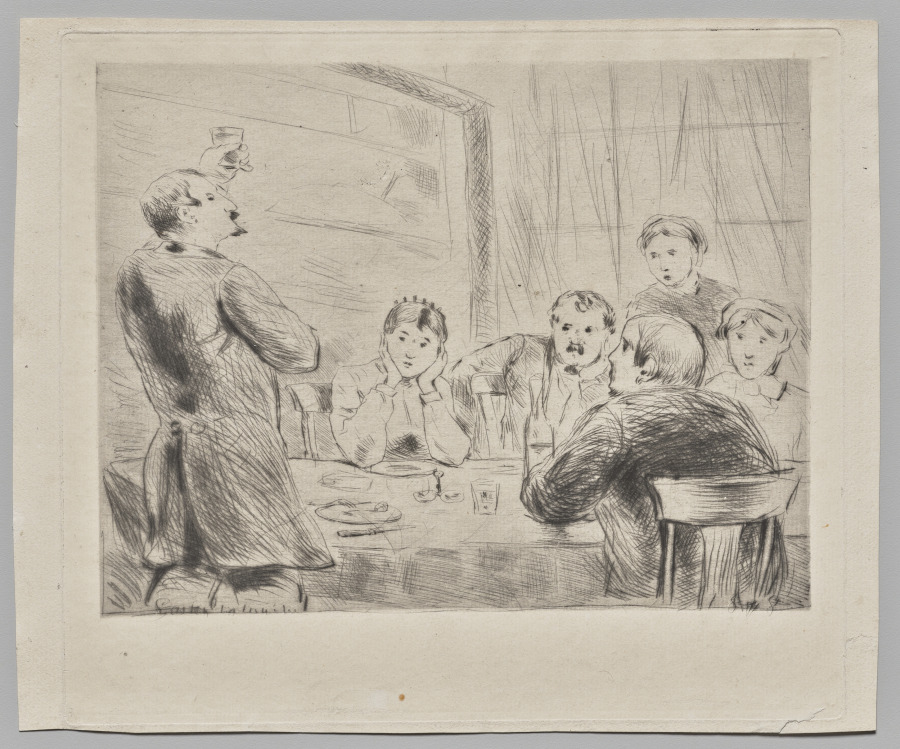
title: Untitled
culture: France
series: L'Assommoir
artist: Gaston de Latouche (French, 1854–1913)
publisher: Cadart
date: 1879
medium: drypoint on laid paper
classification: Print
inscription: Signed, in plate, at lower left: Gaston La Touche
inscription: Watermark: D.C. BLAUW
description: Although his work changed throughout his career, early on Gaston de Latouche belonged loosely to the Impressionist circle through his association with Édouard Manet. Latouche explored subjects—such as that seen here—taken from the lives of working-class Parisians. This print represents a scene from naturalist author Émile Zola’s novel L’Assommoir, which detailed the rise and fall of a laundress named Gervaise. Latouche is said to have collaborated with the author on the imagery and exhibited the entire series at the public Paris Salon in 1879.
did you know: Gaston de LaTouche completely changed the subjects and style of his work around 1890 and destroyed much of his early work.